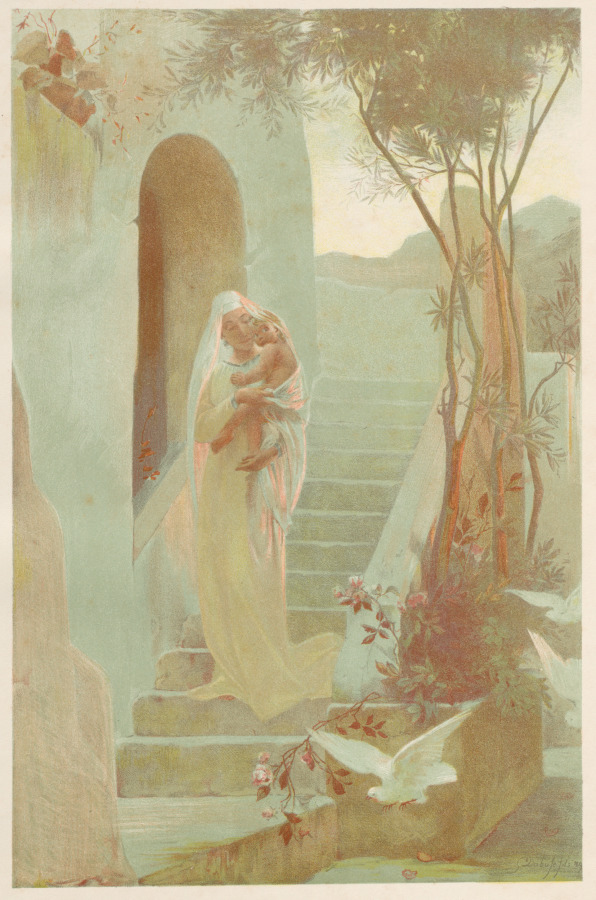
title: L'Enfant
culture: France, 19th century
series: L'Estampe Moderne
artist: Guillaume Dubufe (French, 1853–1909)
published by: Imprimerie Champenois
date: 1899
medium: Color lithograph from bound volume containing 50 lithographs, each with a tissue paper guard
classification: Bound Volume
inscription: In plate, lower right corner of image: Gdubufefils '89; lower right corner of sheet: blindstamp of L'Estampe Moderne (Lugt 2790)